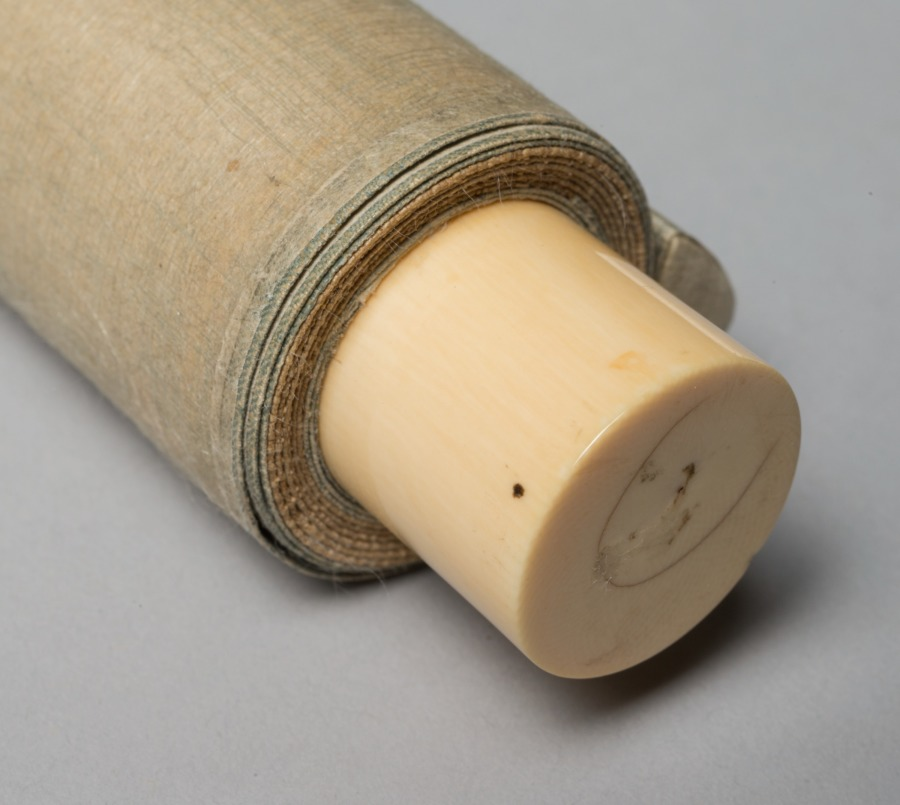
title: Mandarin Duck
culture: Japan, Muromachi period (1392–1573)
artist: Sesson Shūkei (Japanese, c. 1492–c. 1577)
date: 1500s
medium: hanging scroll; ink on paper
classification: Painting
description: In this painting, the artist depicted a scene of a solitary duck floating by reeds in a subtle arrangement of dry and wet, light and dark ink tones which conveys the tranquility of the moment.